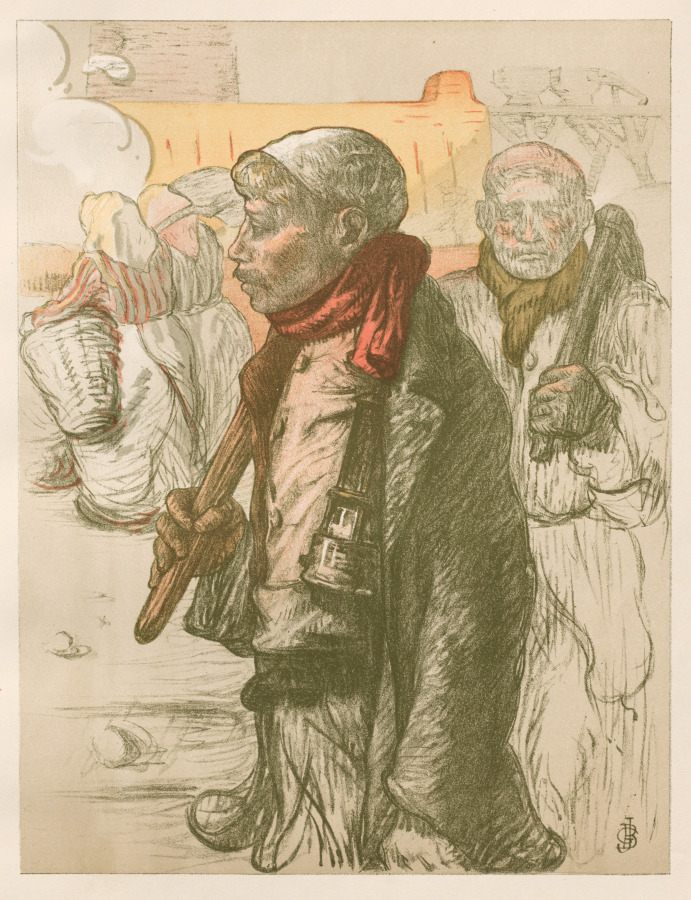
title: Au Pays Noir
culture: France, Paris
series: L'Estampe Moderne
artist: Jules Gustave Besson (French, b. 1868)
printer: Imprimerie Champenois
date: 1899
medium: Color lithograph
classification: Bound Volume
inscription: In plate: lower right corner of image: overlaid "J", "G", and "B"; lower right corner of sheet: blindstamp of l'Estampe Moderne (Lugt 2790)